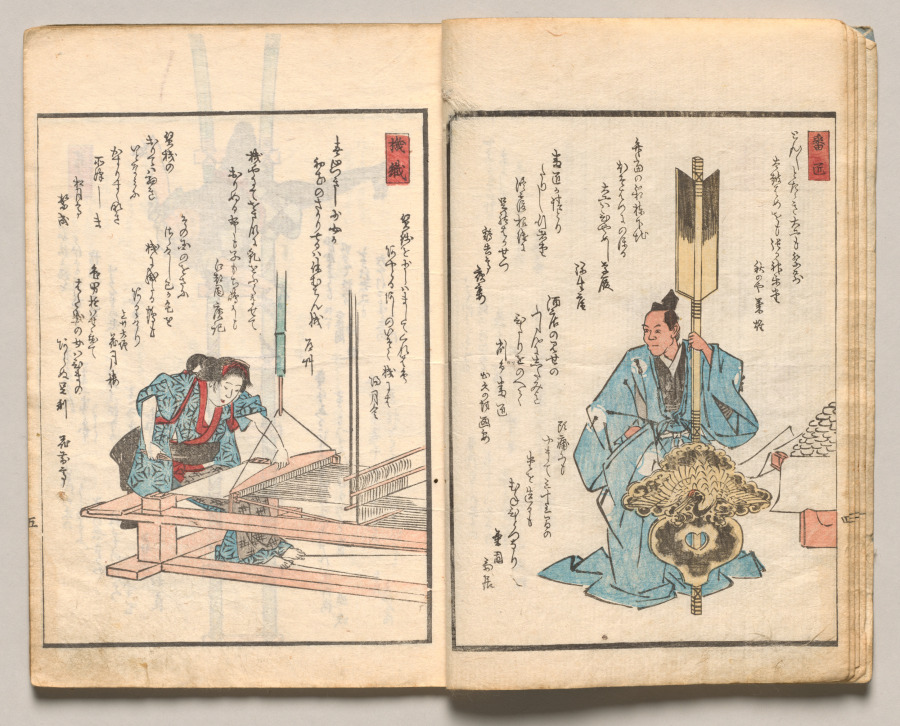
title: Spread Five from Volume Two of People of Japan in Light Verse (Kyōka)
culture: Japan, Edo period (1615–1868)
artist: Utagawa Hiroshige (Japanese, 1797–1858)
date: 1857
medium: Woodblock-printed book; ink and color on paper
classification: Bound Volume